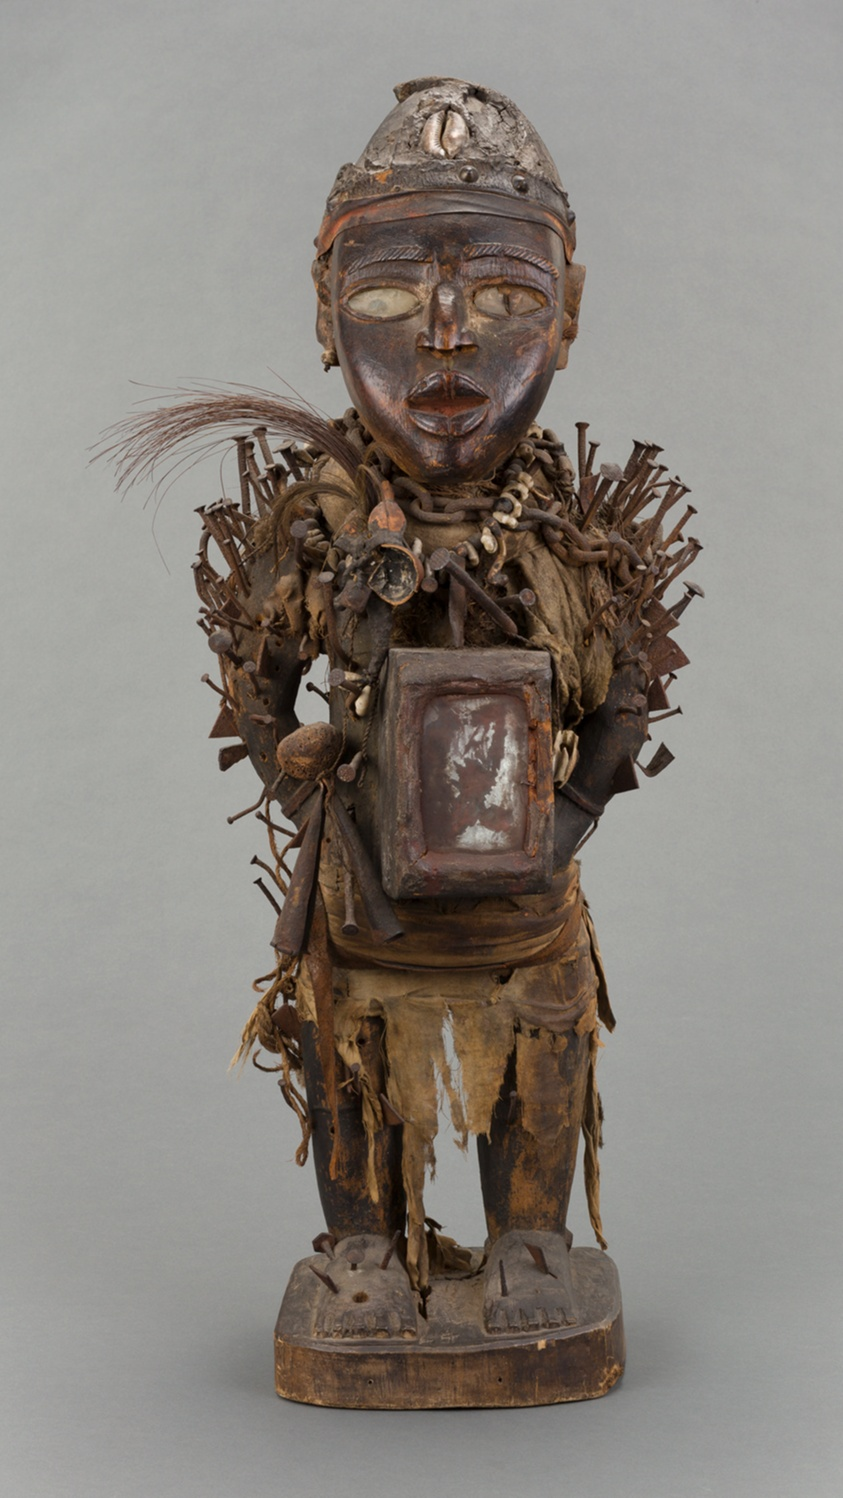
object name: Sculpture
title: Male Figure (Nkisi Nkondi)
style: vili, Arts of Africa, african Art, Central Africa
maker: Kongo: Vili; Republic of the Congo; Central Africa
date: Probably early to mid-19th century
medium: Wood, metal, glass, fabric, fiber, cowrie shells, bone, leather, gourd, and feathers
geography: Republic of the Congo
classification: sculpture; wood; arts of Africa; medicine object; african art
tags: ritual objects, religion, contracts, medicine, sacred, supernatural